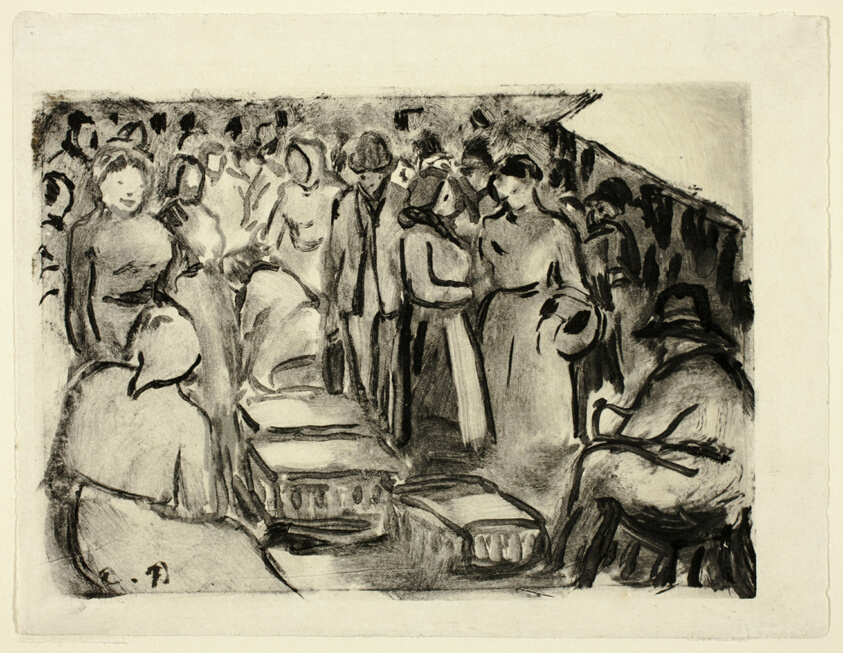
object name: Print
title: The Market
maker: Camille Pissarro (French, 1830-1903)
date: c. 1895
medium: Monotype on cream paper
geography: France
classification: monotype; print; prints and drawing